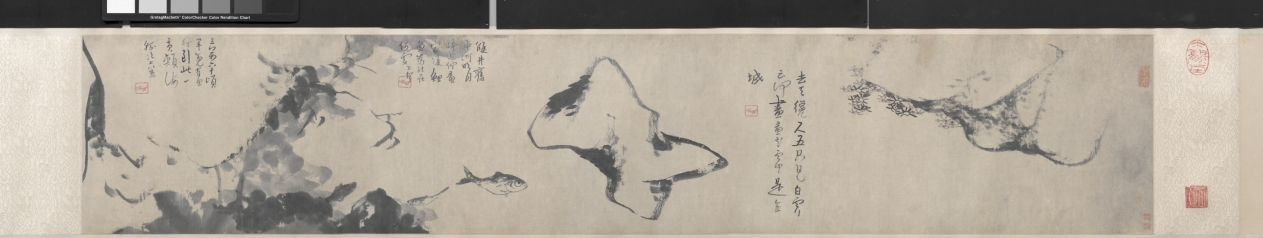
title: Fish and Rocks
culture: China, Qing dynasty (1644-1911)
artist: Bada Shanren (Chinese, 1626–1705)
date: mid- to late 1600s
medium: Handscroll; ink on paper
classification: Painting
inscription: 去天纔尺五，只見白雲行。 云何畫黃花，雲中是金城。 [印] 个山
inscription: 雙井舊中河，明月時延佇。 黃家雙鯉魚，為龍在何處。 [印] 个山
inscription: 三萬六千頃，畢竟有魚行。 到此一黃頰，海潮次上笙。 [印] 个山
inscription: 5 additional seals: 2 of Zhang Daqian 張大千 (1899–1983); 1 of Ta-an Chü-shih; 2 unidentified.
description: Bada Shanren, also called Zhu Da, a 17th-century painter who rejected conventions in favor of an individual, personal expression, is known for his unorthodox compositions of fish, flowers, birds, and rocks. Fish in his paintings are often looking upward toward heaven, swimming in a pond of undefined space. As a member of the Ming imperial family, Zhu Da lost his princely status and hid in a monastery when the Manchus, foreigners from the north, established the Qing dynasty in 1644. This scroll may have some autobiographical meaning, representing fish as leftover subjects (yimin) who lived in a void, having lost their roles in life after the fall of the dynasty.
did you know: After each poem, Bada Shanren used his so-called jixingyin seal 屐形印, which resembles the impression of a shoe on soft mud.